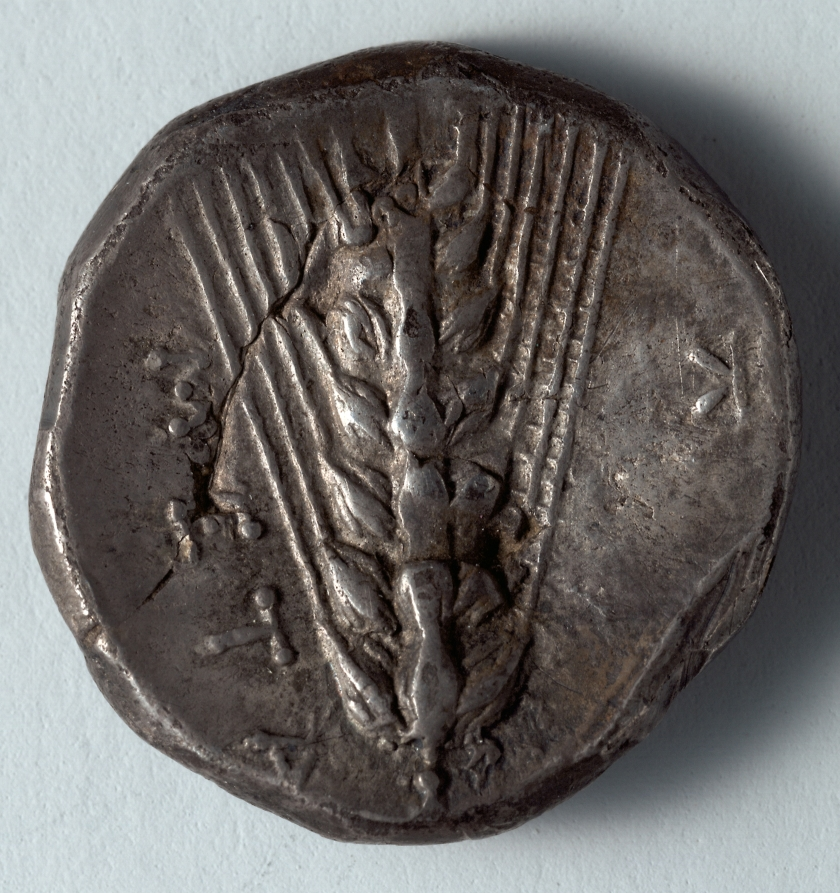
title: Stater: Barley (reverse)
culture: Greek, minted at Metapontion (South Italy)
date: c. 340 BCE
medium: silver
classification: Coins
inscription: ΜΕΤΑ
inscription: ꓘ